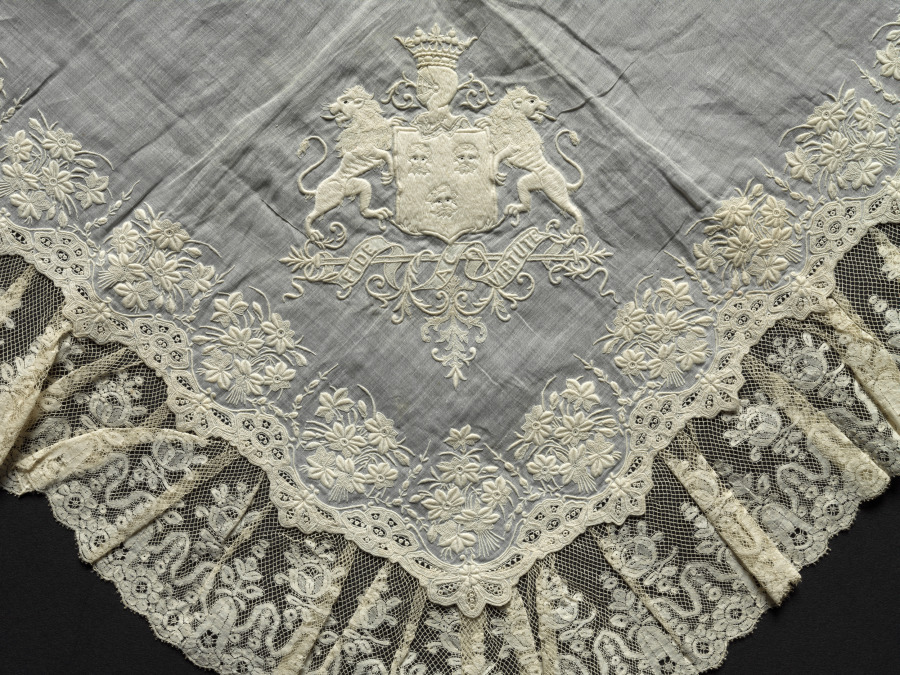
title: Lace Handkerchief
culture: Switzerland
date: 1800s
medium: Plain weave linen center: bobbin lace (Valenciennes lace) edging and embroidery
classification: Embroidery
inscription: crest on one corner with motto: "Fide ac virtute."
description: There is a crest embroidered in one corner of this lace handkerchief, along with the motto "Fide ac virtute" (by faith and virtue).